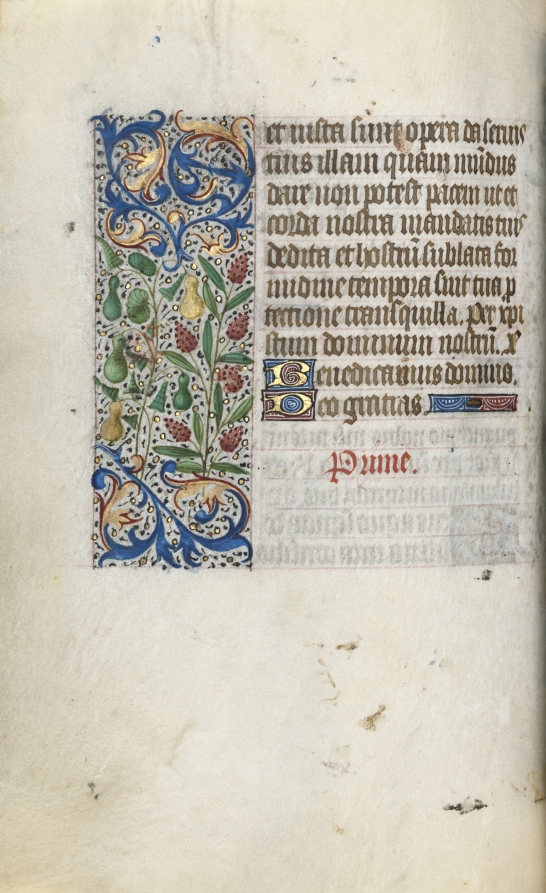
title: Book of Hours (Use of Rouen): fol. 55v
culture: France, Rouen, 15th century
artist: Master of the Geneva Latini (French, active Rouen, 1460–80)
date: c. 1470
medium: ink, tempera, and gold on vellum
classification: Bound Volume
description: In the late 1400s and early 1500s Rouen was an established and important center of book production. The city’s cathedral had a wealthy chapter that spent large sums of money to commission books and to maintain its extensive library. The stationers and booksellers would have likely been concentrated in or near the cathedral precinct. This artist, named after a manuscript now in Geneva, was Rouen’s principal illuminator during the second half of the 1400s.